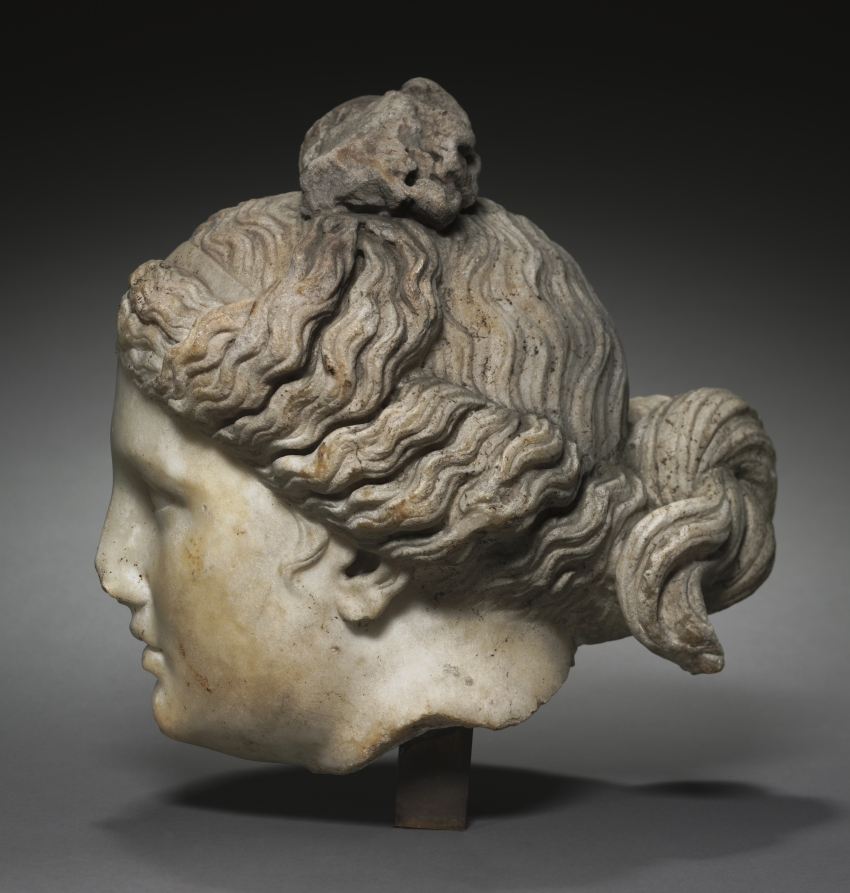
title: Head of Aphrodite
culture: Italy, Roman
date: 100–200 CE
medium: marble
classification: Sculpture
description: With idealized features including a straight nose, small mouth with thick lips, and a hairstyle best known from the so-called Capitoline Venus (now in Rome), this head likely belonged to a full-scale statue of the goddess of love. Like the Capitoline Venus and many other sculptures of the Roman period, it probably showed the goddess nude and bathing, harking back to the groundbreaking sculpture of Aphrodite at Knidos, carved by Praxiteles in the mid-fourth century BC.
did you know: The elaborate hairstyle, arranged in a bow atop the head, identifies this figure as Aphrodite.